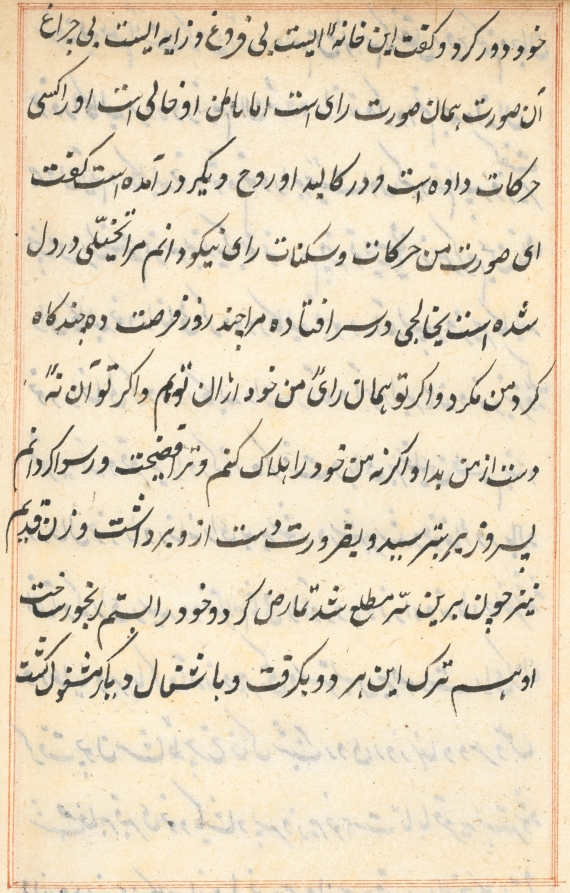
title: Page from Tales of a Parrot (Tuti-nama): text page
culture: Mughal India, court of Akbar (reigned 1556–1605)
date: c. 1560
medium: gum tempera, ink, and gold on paper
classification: Painting